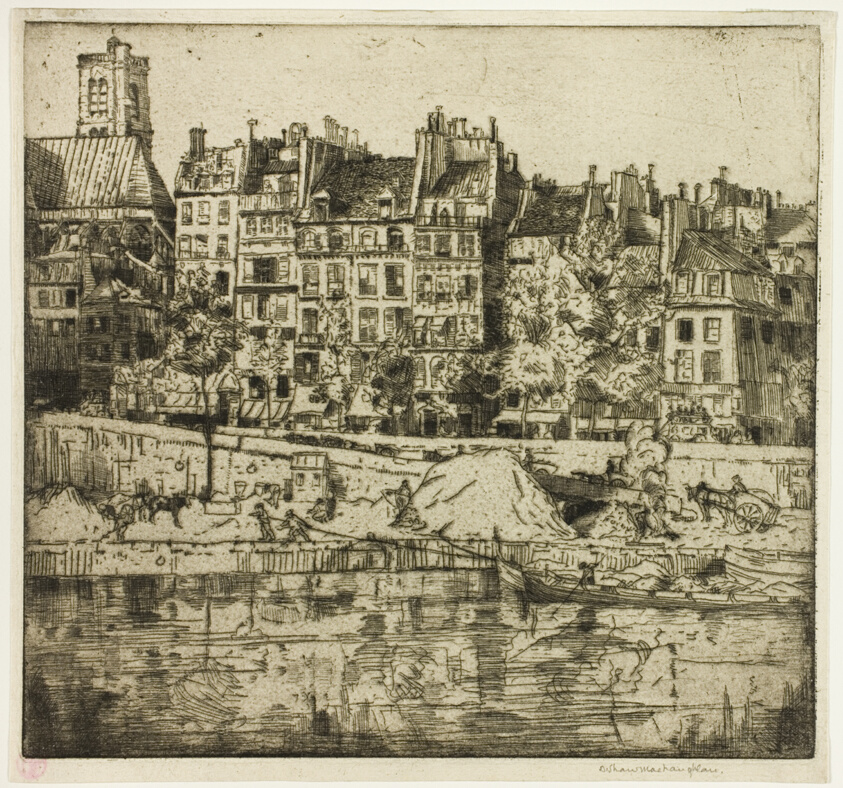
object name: Print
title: Quai de l'Hotel de Ville, Paris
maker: Donald Shaw MacLaughlan (American, born Canada, 1876-1938)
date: 1900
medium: Etching in black on cream laid paper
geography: United States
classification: etching; print; prints and drawing